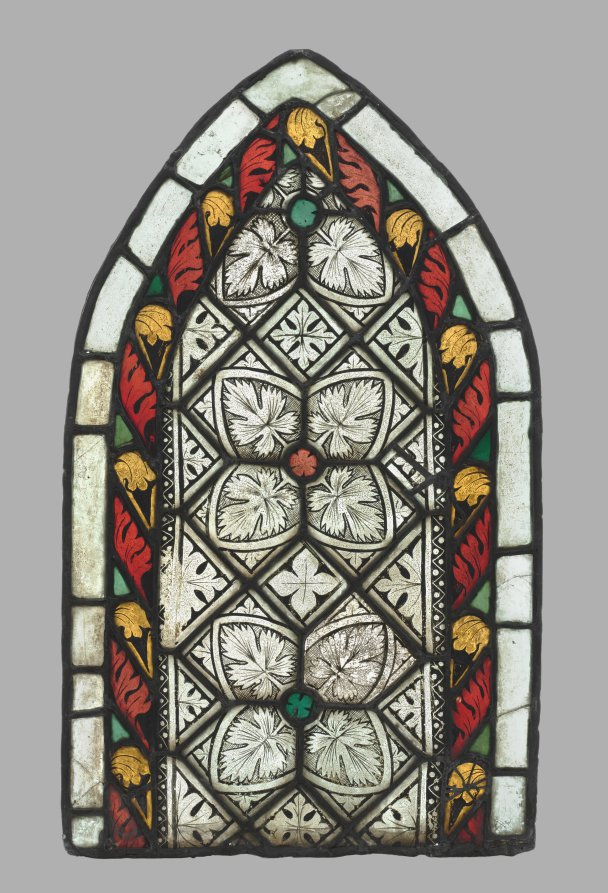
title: Stained Glass Panel with Aconite Leaves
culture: France, Alsace(?), 13th century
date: c. 1275–1300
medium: pot-metal and white glass, silver stain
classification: Glass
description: This stained glass panel is decorated in a grisaille (monochromatic) technique but also includes a colored border using pot-metal glass. The original source of the glass is unknown. The ban of 1134 by the Cistercian Order against using figural art and brightly colored glass suggests this panel may derive from a window in one of that order’s churches. This is the earliest stained glass in the museum’s collection.